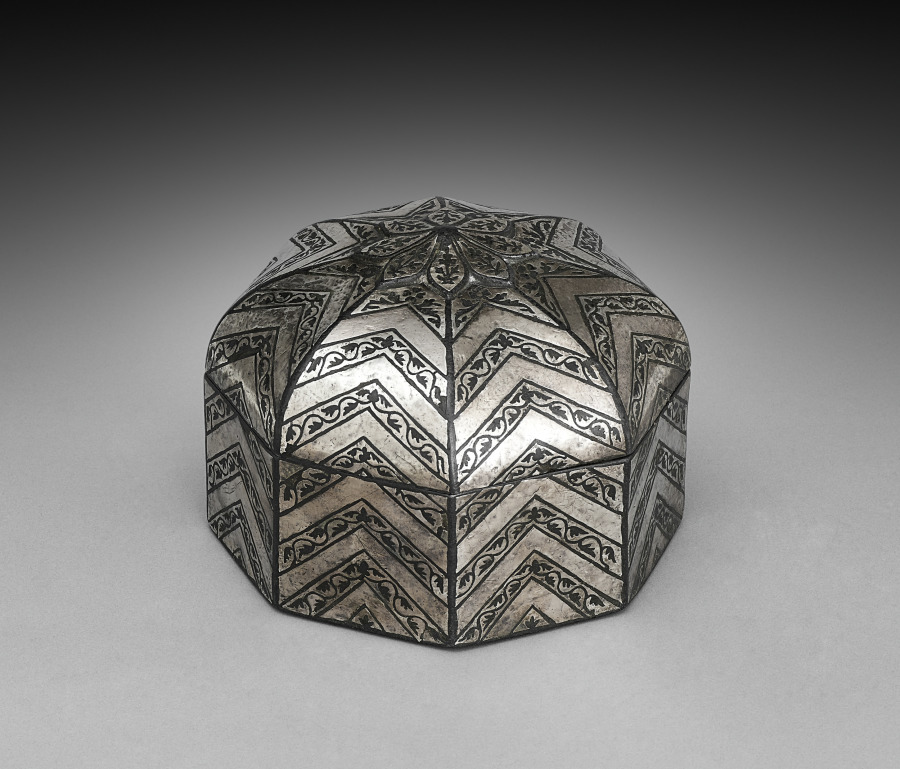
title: Bidri Pandan with Chevrons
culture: Southwestern India, Deccan, Karnataka, Bidar​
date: c. 1700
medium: Zinc alloy with silver overlay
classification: Metalwork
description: A pandan is a lidded vessel for serving paan, which has been enjoyed in India for more than two thousand years. Paan is betel or areca nut mixed with lime powder, aromatics such as clove cinnamon, or cardamom, and wrapped in betel leaf. The whole packet is chewed after a meal as a mild stimulant and mouth freshener.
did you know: The lime powder in paan functioned as an ancient antacid after meals.